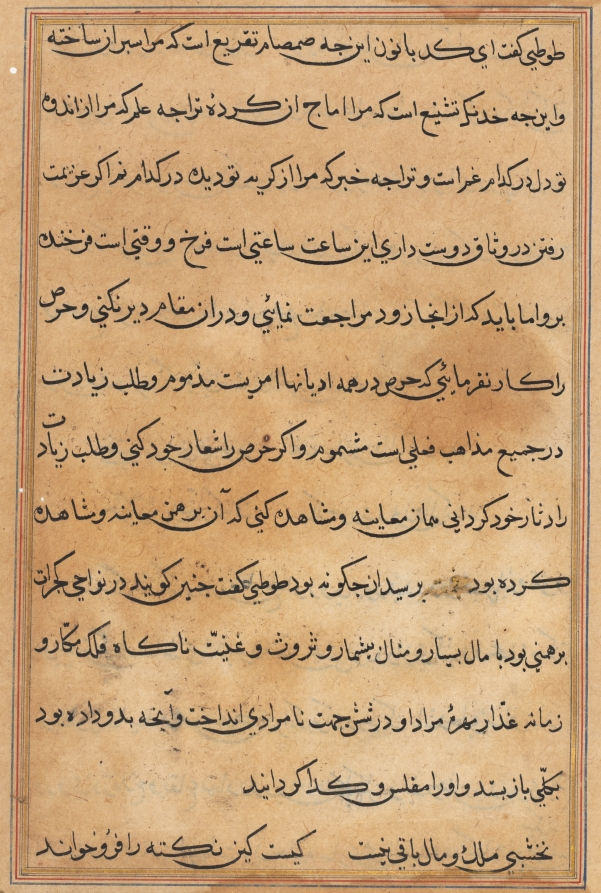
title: Page from Tales of a Parrot (Tuti-nama): text page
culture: Mughal India, court of Akbar (reigned 1556–1605)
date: c. 1560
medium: gum tempera, ink, and gold on paper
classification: Painting